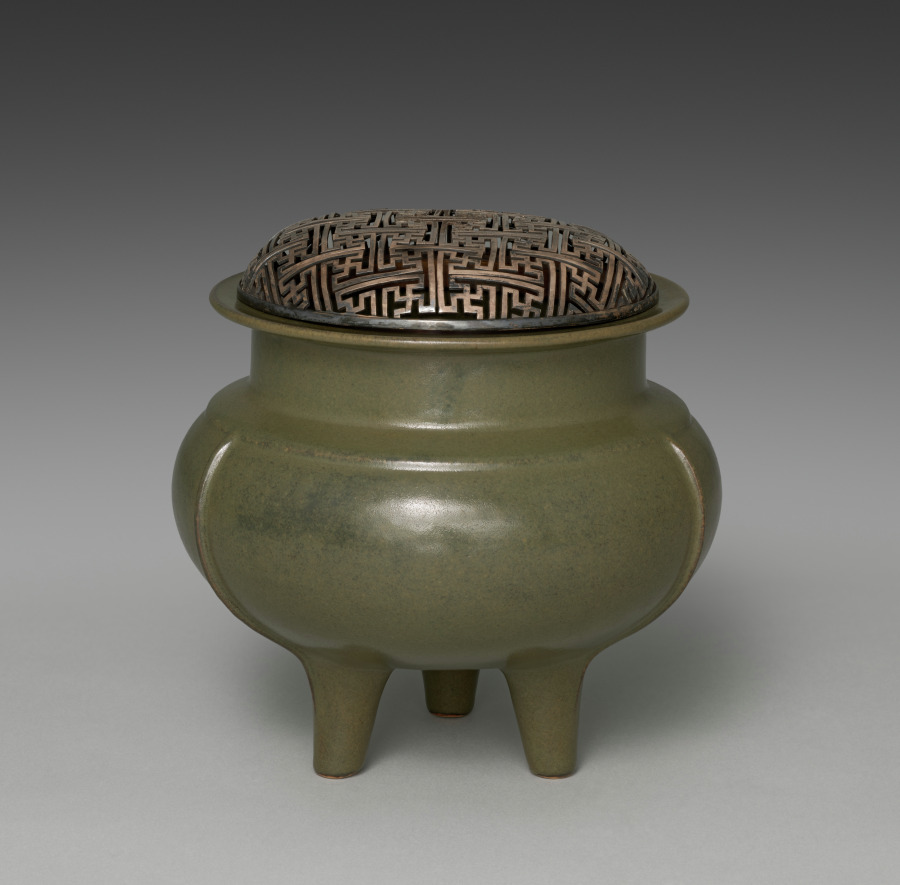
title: Incense Burner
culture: Japan, Meiji period (1868–1912)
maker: Seifū Yohei III (Japanese, 1851–1914)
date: 1895–1914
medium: Porcelain with tea-leaf colored glaze and molded design and geometric openwork silver lid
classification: Ceramic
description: Kyoto-based Japanese ceramist Seifū Yohei III (1851–1914) admired the glaze colors found on Chinese porcelain and tried to replicate them through intensive experimentation. His green and creamy white glazes were particularly well received. The combinations of colors with subtle molded and incised decorations in his ceramics respond powerfully to changes in light, creating a dynamic viewing experience. Names for the glazes, written in ink with a brush on the lids of the custom-made storage boxes for the works, often indicate a specific glaze or ware that had inspired him, even when the resulting color was distinctively his own.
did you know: This incense burner with a geometric-patterned silver lid has a glaze identified on its box lid as “tea leaf [color–glazed] porcelain” (chayōji).